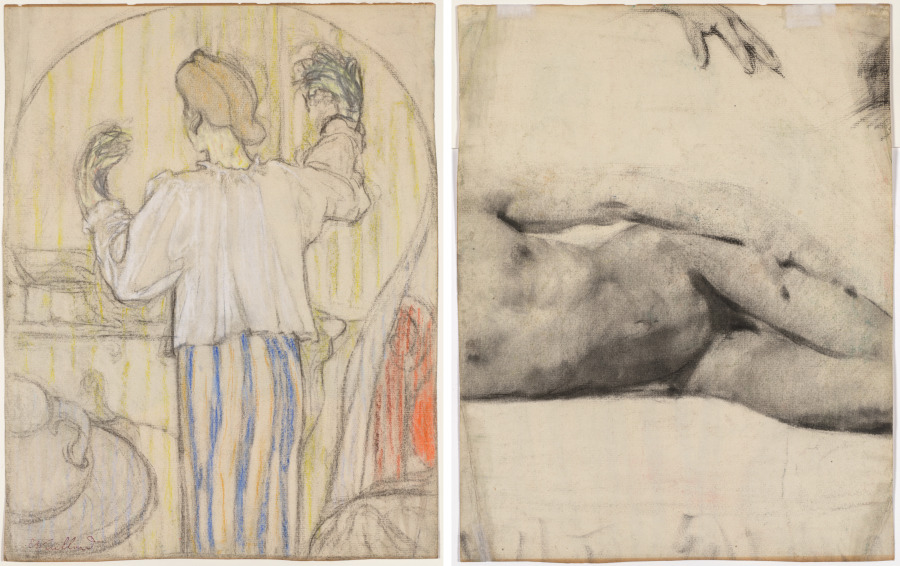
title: In Front of the Mirror (recto); Reclining Male Nude (verso)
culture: France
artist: Edouard Vuillard (French, 1868–1940)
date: c. 1891–92 (recto); c. 1887–89 (verso)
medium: pastel and charcoal on beige paper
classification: Drawing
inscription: stamped, lower left, in purple ink: E Vuillard [Lugt 2497b]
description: During the early 1890s, Édouard Vuillard repeatedly represented his mother and older sister, Marie, in domestic settings. This drawing relates to a pastel and painting, all of which show Marie standing before a mirror, raising her arms as if to adjust her hairstyle. A charcoal study of a nude male appears on the verso, suggesting that the artist may have reused the sheet.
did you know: Vuillard created this portrait of his sister Marie while she was living at home and working with their mother at her corset- and dressmaking business.